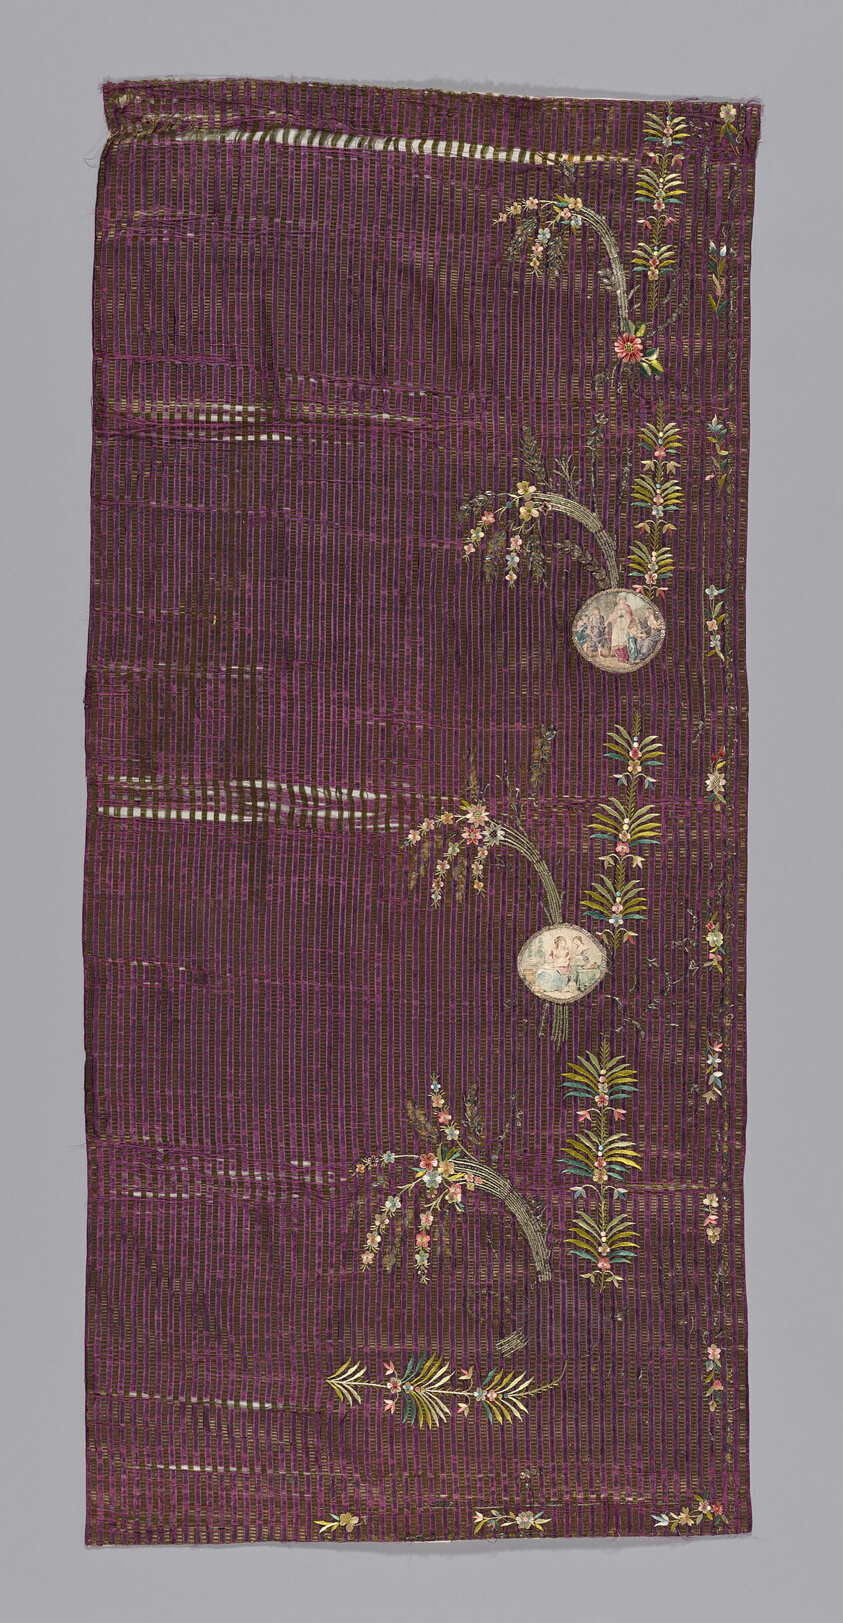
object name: Textile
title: Skirt panel?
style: directoire, european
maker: France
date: Directoire period, 1795/99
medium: Silk, plain weave with supplementary patterning warps and self patterning ground weft floats; embroidered with silk threads in satin stitch, outline stitch and French knots; attached silver wire coils, wrapped around a silk fiber core, sequins, stones and appliquéd circles of silk, satin weave, painted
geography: France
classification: textile; needlework (visual works); costume